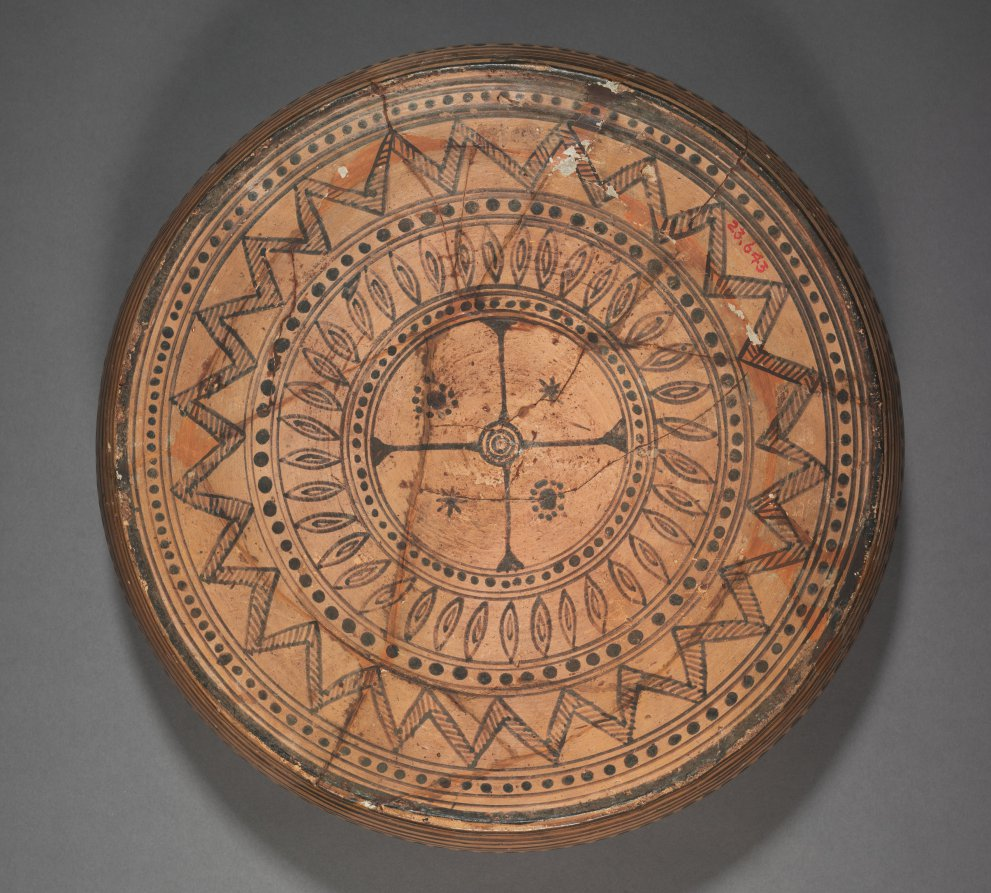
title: Geometric Horse Pyxis (Cylindrical Box)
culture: Greek, Attic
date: c. 760–750 BCE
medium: ceramic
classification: Ceramic